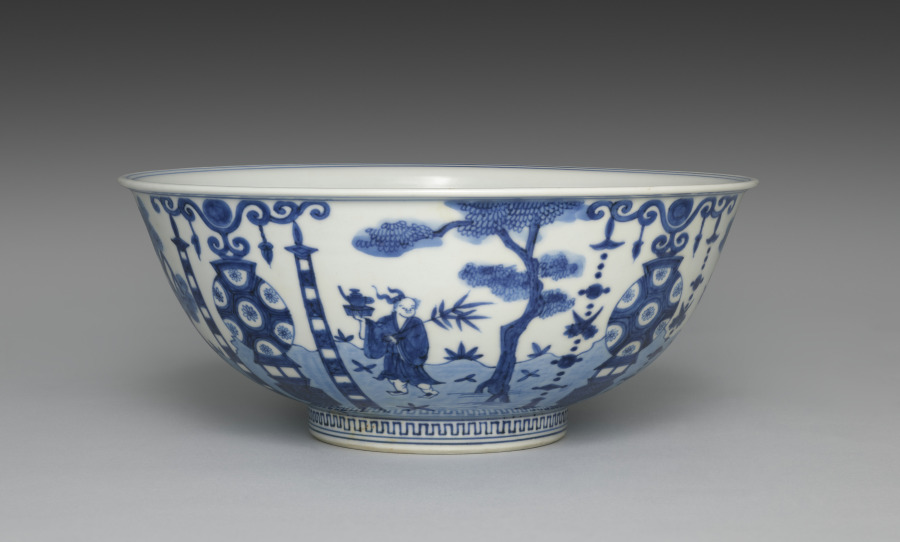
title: Bowl from Nesting Bowls with Daoist Immortals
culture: Japan, Meiji period (1868–1912)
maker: Seifū Yohei III (Japanese, 1851–1914)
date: 1893–1914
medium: Outer bowl from a set of three bowls; porcelain with underglaze blue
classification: Ceramic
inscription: 清風与平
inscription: 大日本清風造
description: Yohei III was capable of ink painting–like compositions in underglaze blue, as well as more decorative ones like that on this set of three nesting bowls. Bowls with very similar designs in five colors were produced in the reign of the Wanli emperor (r. 1572–1620) during the Ming dynasty, and Yohei must have had direct access to one of these or to a close copy. A scene of Daoist immortals is presented on the bowls. On each one, the ground plane is defined with a blue wash. Four lanterns are evenly spaced around the bowl. Two are flanked with linked-piece metalwork banners of the seven treasures. The alternate altars are adorned with textile banners. In between them are four immortals, each standing beneath a tree with small plants surrounding his feet. Two of the immortals hold fruit on a tray. Another carries an elixir-filled ewer and a willow branch. The fourth holds a swastika (manji), here an auspicious symbol, and a flower. Curiously, the inscription inside each footring reads “Made by Seifu of Great Japan,” in emulation of the dynasty and reign inscriptions that appear on Chinese ceramics; however, one can also see through the translucent glaze another inscription, “Seifu Yohei,” written in large characters within a double band of blue on the largest bowl.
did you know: In the bottom of each bowl is a scene of two robed immortals who appear to stand on a precipice in a mountainous landscape high in the clouds, with celestial orbs over their heads.